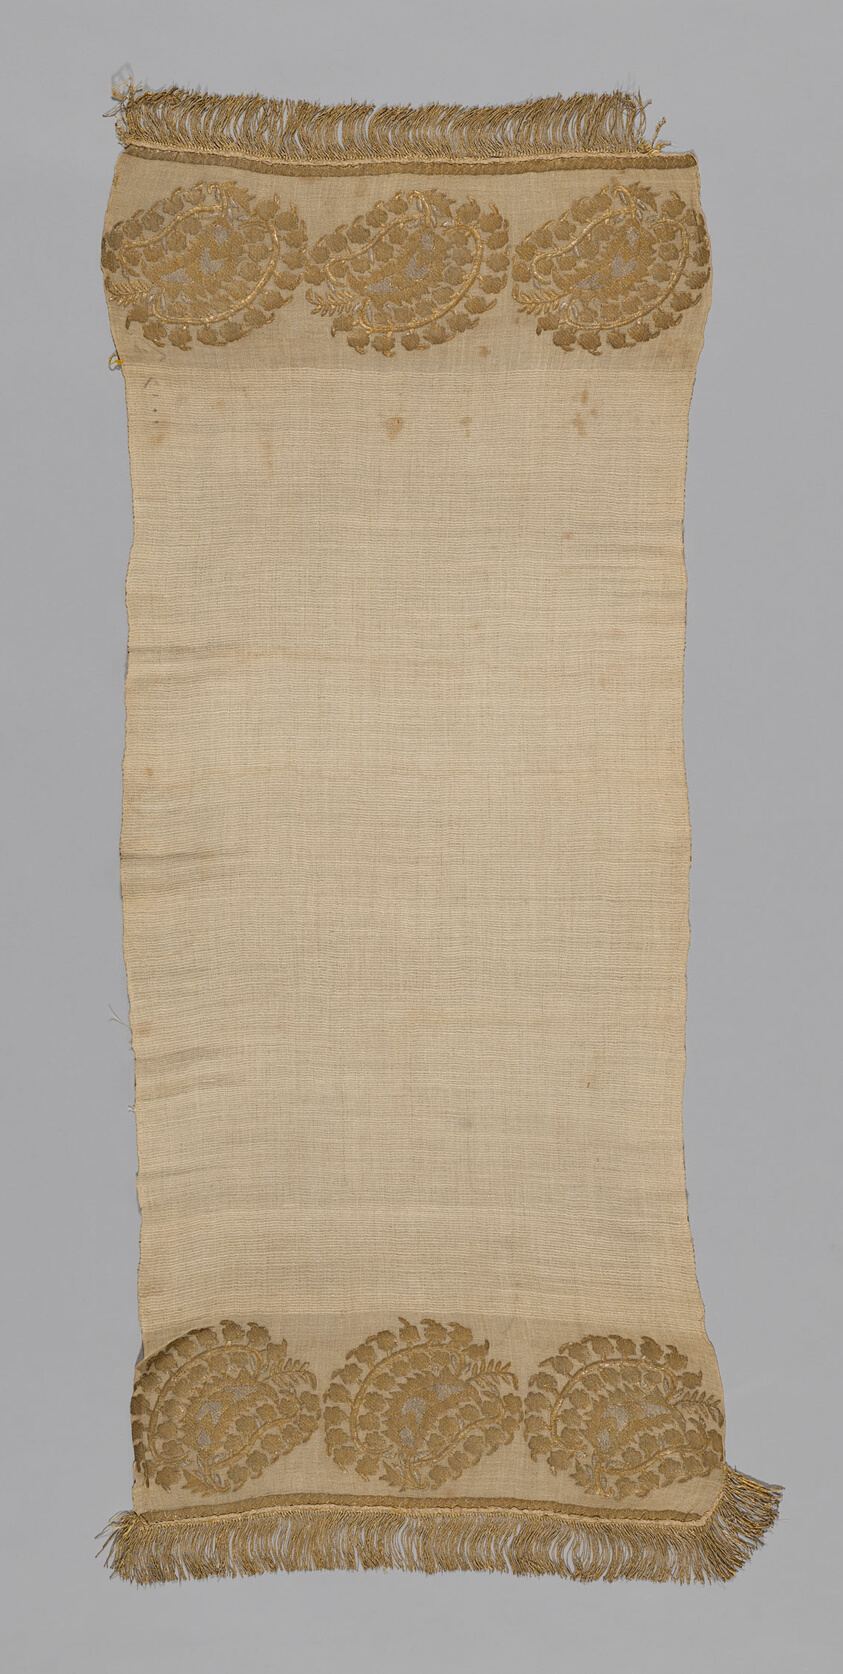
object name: Textile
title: Towel or Napkin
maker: Turkey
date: 1850/1900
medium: embroidered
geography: Turkey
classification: textile; needlework (visual works); weaving